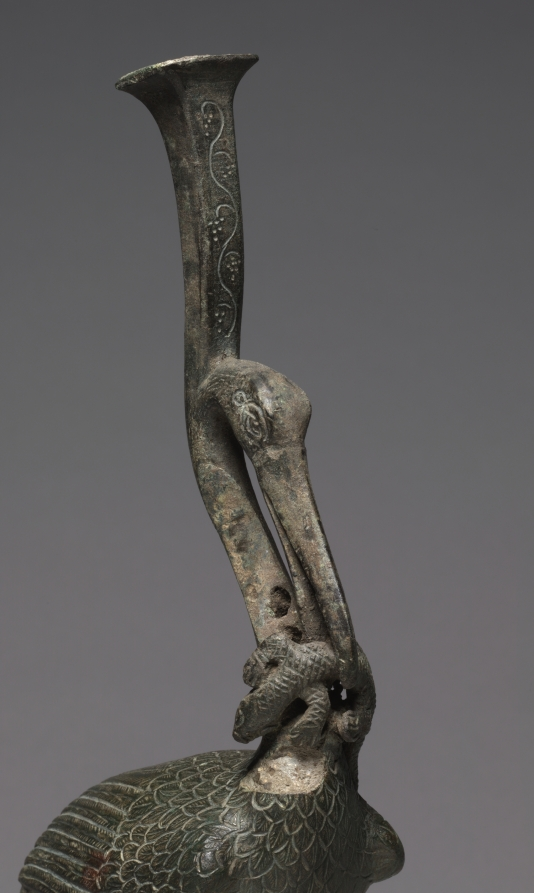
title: Ibis Eating a Lizard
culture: Italy, Rome, Roman Empire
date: 100 BCE–100 CE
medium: bronze, hollow cast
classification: Sculpture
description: The ibis is an Egyptian bird, shown here standing firmly on both legs with a lizard in its beak. The bird rests on a two-tiered circular base, and a vertical stem with incised decoration extends above the ibis’s head. While an Egyptian animal, the image of the ibis devouring a lizard became common only in the Roman world, depicted in wall paintings and seen on Barbotine ware, a type of pottery. This sculpture may be unique, however, in showing this motif in the round.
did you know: This sculpture was possibly used as a support for furniture, a candelabrum, or an incense burner.